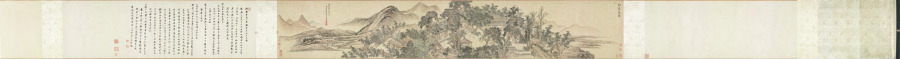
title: Hall of Lofty Pines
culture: China, Qing dynasty (1644-1911)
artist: Wang Hui (Chinese, 1632–1717)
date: 1703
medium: handscroll; ink and color on paper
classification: Painting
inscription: [題] 松喬堂圖 康熙癸未夏六月, 海虞耕煙散人王翬畫。[印]王翬之印; 石谷. [左下] 來青閣; 耕煙野老時年七十有二.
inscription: 松喬堂圖一卷，海虞石谷王君為靜海近公厲少司冦公作也。圖成于癸未之夏。未幾而公遂仙去。公令子今編修君南湖屬余題跋其後。余與公同官侍從，交契最深。側見公之清修純德，蔚為聖天子所眷重。侍直內廷，密勿贊襄，幾二十餘年。蒼生之所以受賜，士林之所以沐德者，天下莫能窺，在廷莫能悉。而公卒不言。以故宸衷日益契，恩禮亦日益渥。雖年逾懸車，時有歸老之念。而上固不聼公之去。其所謂松喬堂者，御書以賜公者也。蓋以松比公之清風勁節，而歲寒不改，經霜彌茂。則又以期公之壽考未有艾焉。公知此身未易乞，而山林槃磵之樂，止可寄諸寤思。此松喬堂圖之所由作也歟。石谷此圖，結構精密，筆墨超邁。其寫樹木之蒼蔚，堂宇之靚幽。恍見摩詰輞川樂天廬山之勝。獨惜公未得一日徜徉故園以償其願。即繪於圖亦未得以永其趣，此編修君之所以眷眷不忘也。雖然千歳之松喬，下蔭百畝，上以修棟梁之需。然則上當日名堂之意，不更望於後之人襲其芘而養其材也哉。吾願編修君之寶斯圖。并望君之塗塈丹雘，大其堂構也已矣。 康熈丙戍重陽三日，雲間王鴻緒跋。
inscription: 10 additional seals: 1 seal of Li Duna 勵杜納 (1628–1703); 4 seals of Zha Ying 查瑩 (jinshi of 1766); 5 seals of Li Yun (dates unknown).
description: Wang Hui 王翬, a leading painter in the orthodox school of the early Qing dynasty (1644–1911), was commissioned to paint this landscape with a country estate for Li Duna 勵杜納 (1628–1703), vice minister of justice in Emperor Kangxi’s court. The emperor had honored Li by granting him a piece of calligraphy with the name of Li’s retirement retreat, “Hall of Lofty Pines.” He drew a comparison between pines and Li’s upright character, resilience, and longevity. Wang Hui’s painting was supposed to allow Li to imagine living in a beautiful, secluded compound among the hills and pines. Sadly, Li died before seeing the completed painting and before receiving the emperor’s permission to retire. The landscape begins with peaceful riverbanks and low hills. The pines around the estate in the middle of the handscroll are truly lofty, some stretching even beyond the frame of the painting. Li Duna, the estate’s owner, is shown twice in his serene mountain retreat: first approaching the entrance to the compound with two servants at the right, and then later in the scroll, to the left, reading in the comfort of an inner room.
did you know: One servant carries the estate owner's carefully wrapped qin, a type of zither.